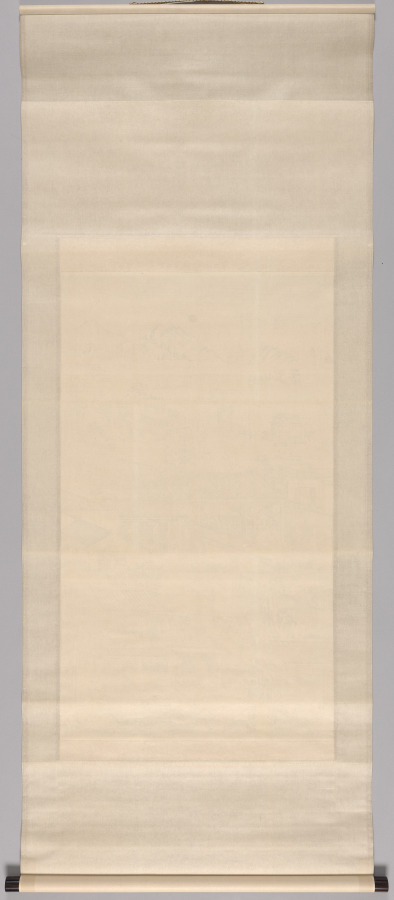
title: Part of Story of The Western Chamber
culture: China, Qing dynasty (1644–1911), Qianlong reign (1736–95)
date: 1736–95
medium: Hanging scroll; polychrome woodblock print; ink and color on paper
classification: Print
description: Woodblock printing in color reached its height in China in the 1600s to 1700s . It was executed by means of sets of separate blocks, each carved to print a different color.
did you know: In the 1600s, printing flourished in such Jiangnan cities as Nanjing, Suzhou, Hangzhou, and Huizhou, evolving from privately enjoyed illustrated books printed in color to more commercialized single-sheet color prints that were hung on walls and became part of the rich urban visual culture.